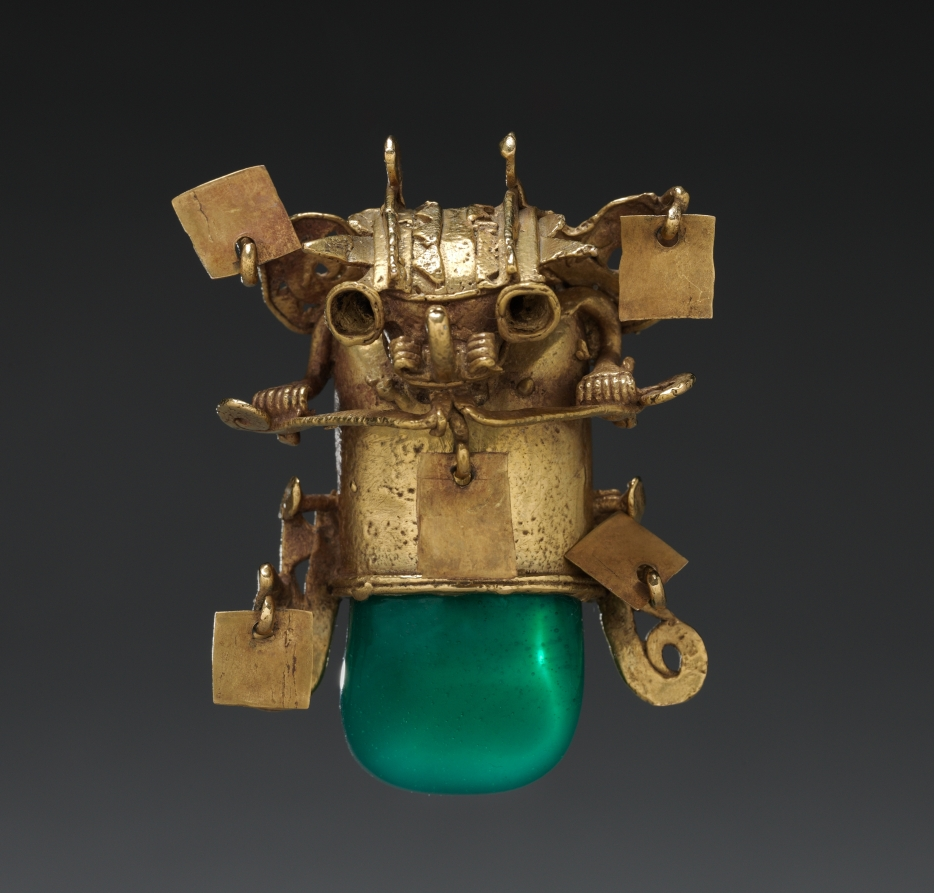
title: Crocodile Pendant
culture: Panama, Azuero Peninsula, Parita style, 11th-16th century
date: 1000–1550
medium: cast gold, modern greenstone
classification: Metalwork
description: Of great importance in ancient Panama were beings that combined crocodile features, especially the mouth, with lizard traits, such as the iguana’s head crest. This example also has a back-swept nose, perhaps that of the leaf-nosed bat. The greenstone is a modern replacement for a stone or shell that once completed the crocodile’s body.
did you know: The greenstone replaced a piece of carved whale bone that was once improperly paired with the pendant.